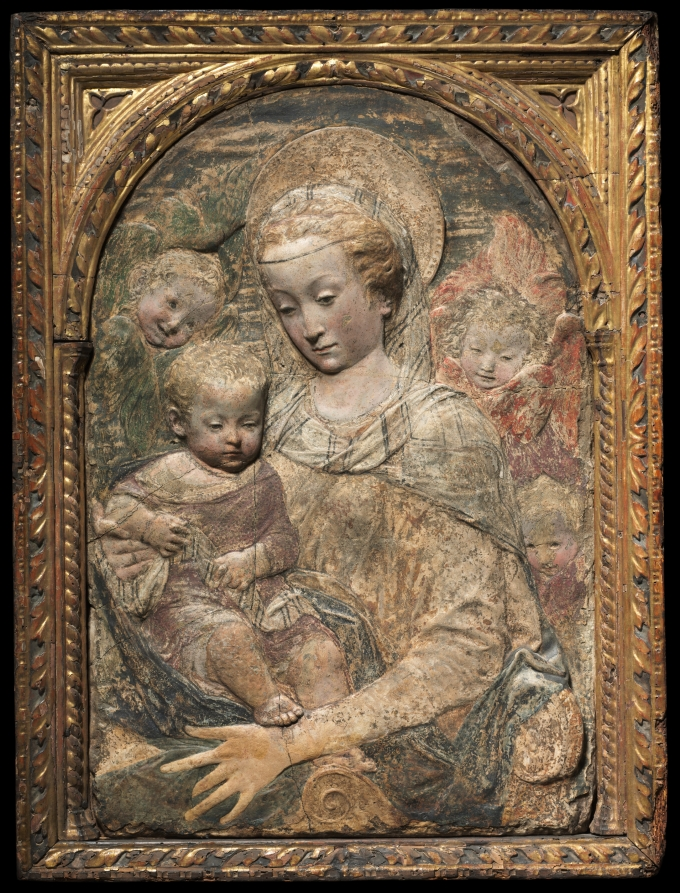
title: Madonna and Child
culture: Italy, Florence, 15th century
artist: workshop of Antonio Rossellino (Italian, 1427–1479 )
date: c. 1470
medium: painted stucco with traces of gilding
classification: Sculpture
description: This relief is one of several such painted stucco replicas cast after the marble original of about 1460–65 now in the Pierpont Morgan Library, New York. While this example has suffered old and obvious losses, it still conveys the overall composition and some of the subtlety of modeling of the marble. In addition, it retains sufficient portions of its fifteenth-century paint and gilding to suggest a colorfulness and richly decorated surface which the marble was never intended to have, and which connects this work with panel paintings of the time. The gilded wooden frame, not made for this relief, is Venetian and dates to about 1400–1450.